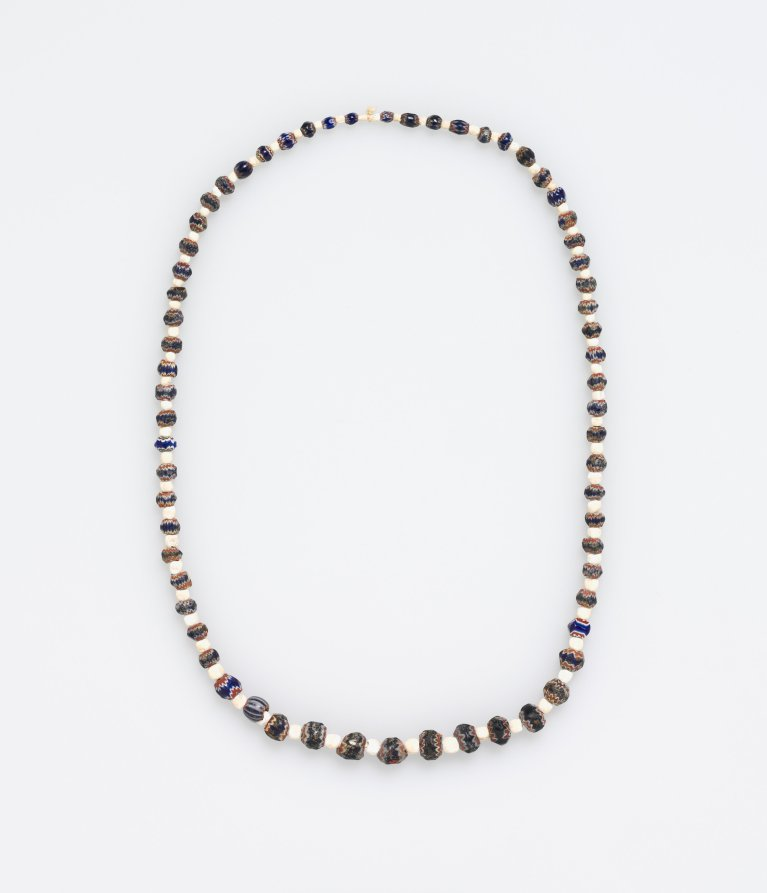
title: Necklace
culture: Peru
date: before 1532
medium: bone and beads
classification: Jewelry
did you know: These ancient beads were restrung in modern times.